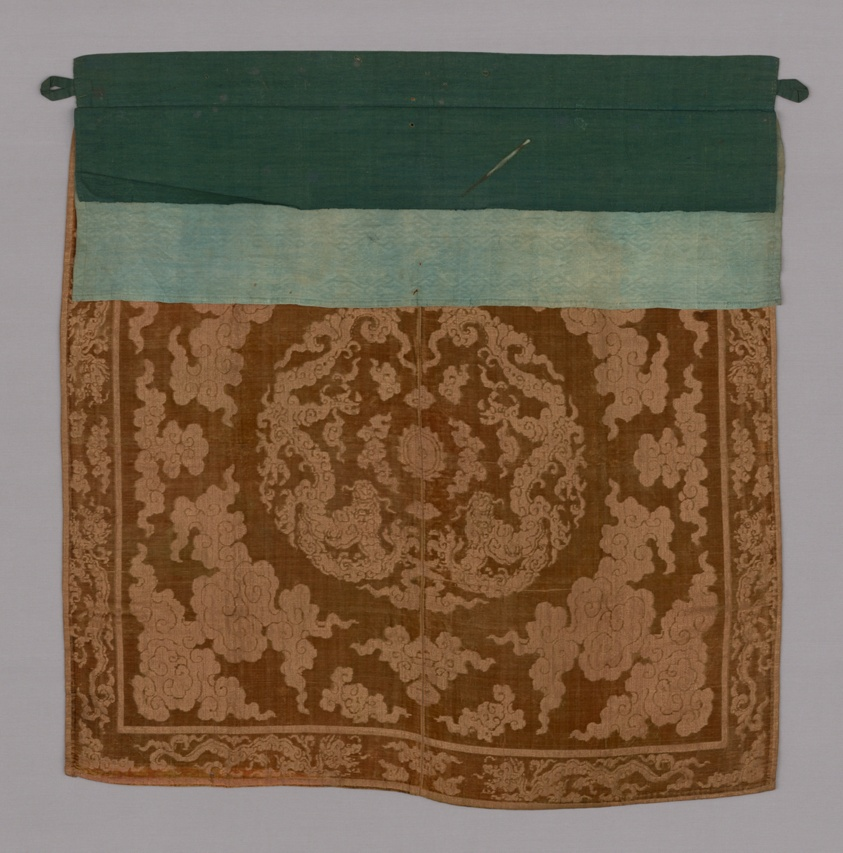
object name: Textile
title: Panel (Furnishing Fabric)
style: qing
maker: China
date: Qing dynasty (1644–1911), 1850/1900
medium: brocade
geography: China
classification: textile; weaving - velvet; weaving; furnishing textile